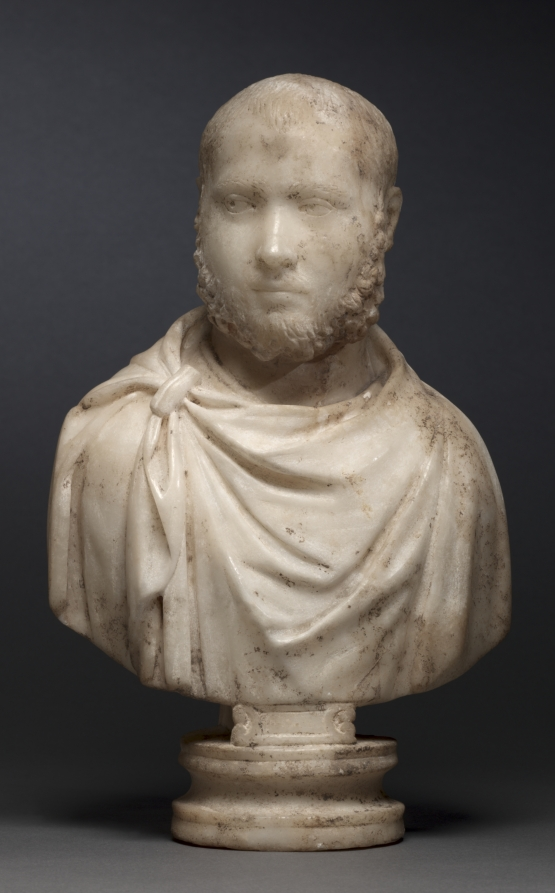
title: Portrait Bust of an Aristocratic Man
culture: Anatolia, late Roman-early Christian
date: 280–90 CE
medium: marble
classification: Sculpture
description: These three pairs of marble portrait busts depict an aristocratic Roman couple. They are unique in representing the same couple three times with only minor variations in costume. Allegedly found together with the Jonah Marbles, they may represent the Christian patrons who commissioned the Jonah cycle.